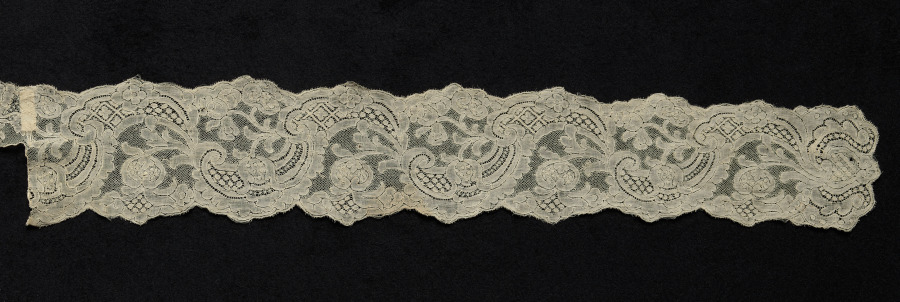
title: Lace Lappets and Edging for Cap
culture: Belgium, Mechelen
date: 1700s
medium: Bobbin lace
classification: Lace